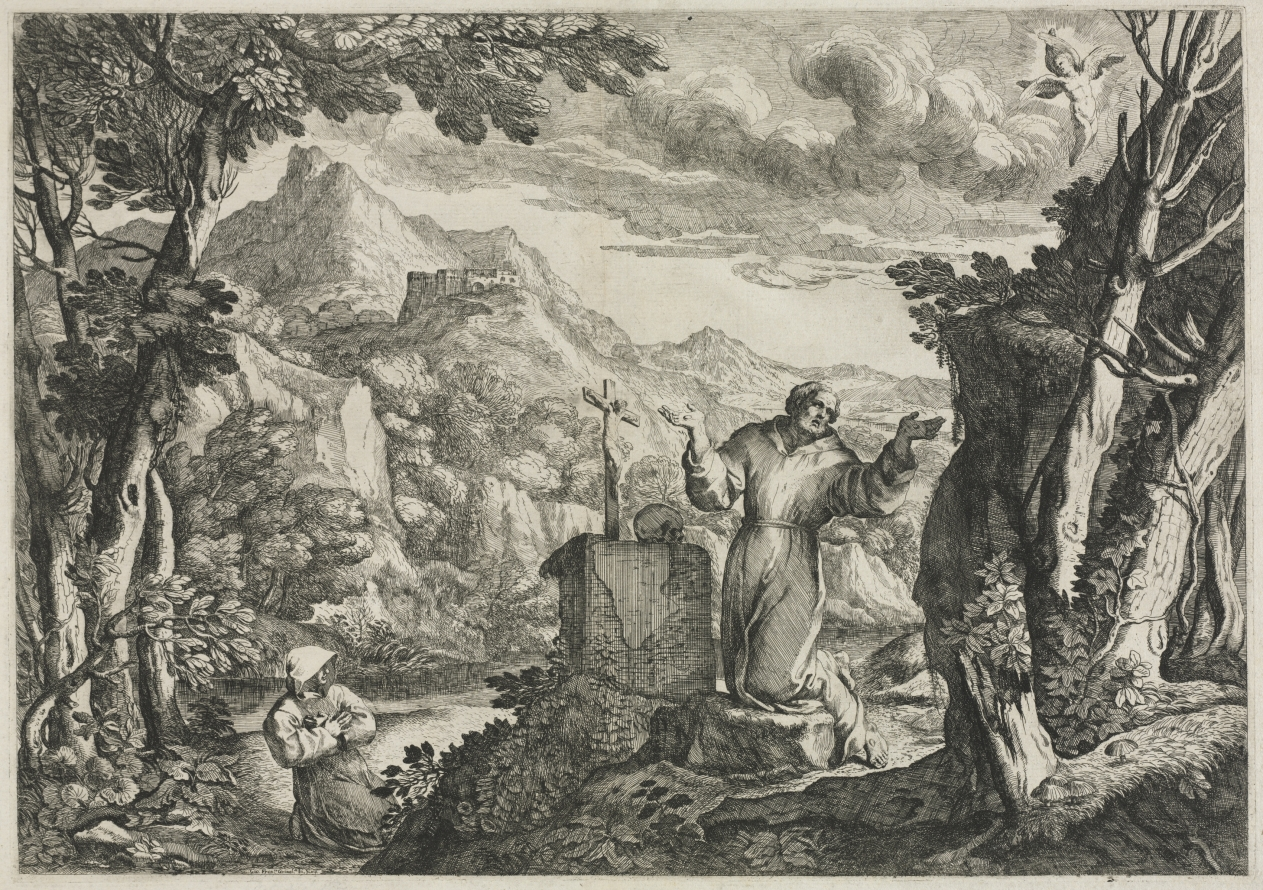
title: St. Francis of Assisi Receiving the Stigmata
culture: Italy, 17th century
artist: Giovanni Francesco Grimaldi (Italian, 1606–1680)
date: 1640–60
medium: etching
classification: Print